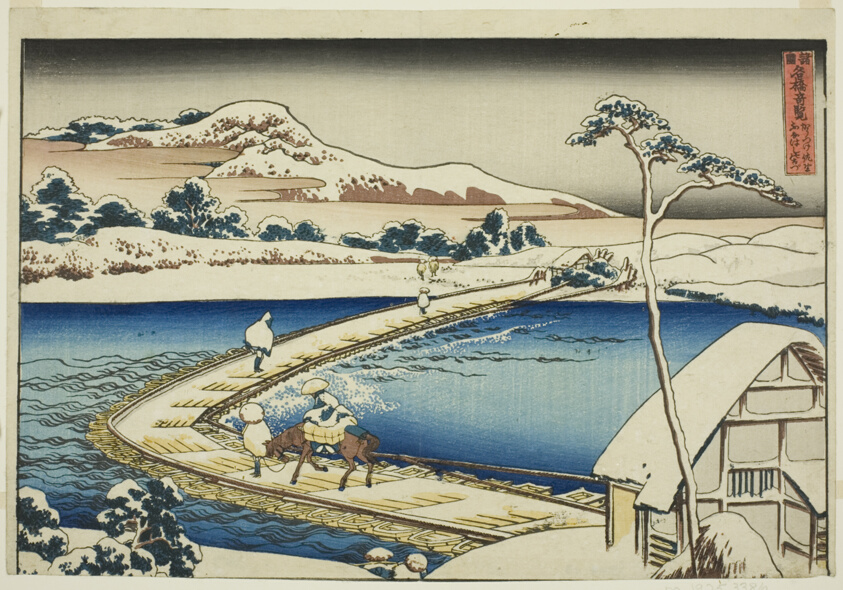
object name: Print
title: Ancient View of the Pontoon Bridge at Sano in Kozuke Province (Kozuke Sano funabashi no kozu), from the series "Unusual Views of Famous Bridges in Various Provinces (Shokoku meikyo kiran)"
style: Japanese (culture or style)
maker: Katsushika Hokusai 葛飾 北斎; Japanese, 1760-1849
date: c. 1833/34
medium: Color woodblock print; oban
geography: Japan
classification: woodblock print; print; asian art